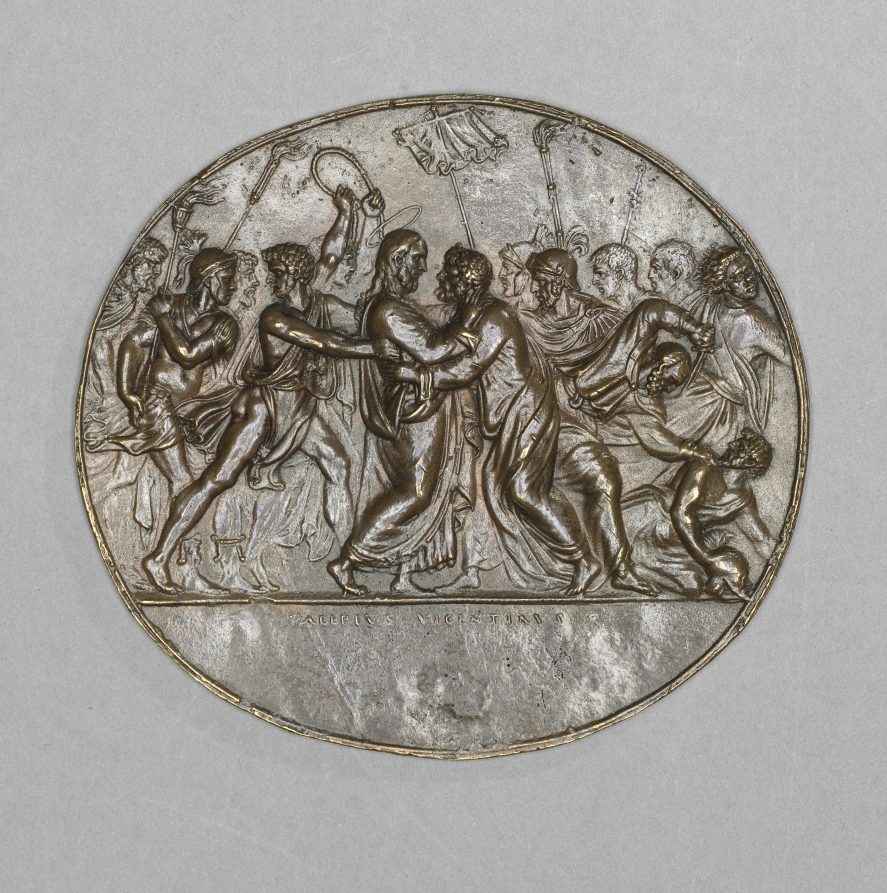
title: The Betrayal of Christ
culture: Italy, 16th century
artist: workshop of Valerio Belli (Italian, c. 1468–1546)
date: c. 1525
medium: bronze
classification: Sculpture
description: Born in Vicenza, Belli worked in Rome as a successful crystal and gem engraver, goldsmith, and medalist. His bronze plaquettes come almost without exception from crystal or hardstone carvings. This particular plaquette directly derives from a rock crystal intaglio by Belli bearing the same inscription in the Biblioteca Apostolica Vaticana, which originally was mounted with two other oval medallions of Christ Carrying the Cross and the Entombment in the silver-gilt base of a rock crystal crucifix, also in the collection of the Vatican Library. This crucifix is generally identified as the one, according to Vasari, created for Clement VII for which Belli received a payment of 1,111 gold ducats in 1525.